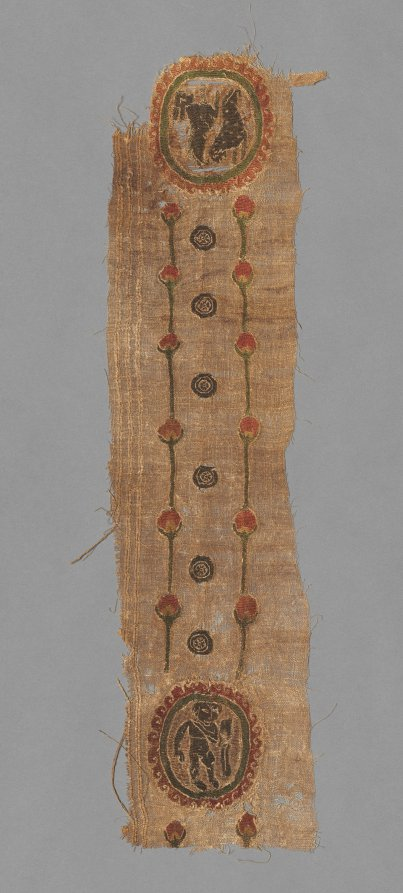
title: Fragment with Two Roundels and a Band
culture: Egypt, Umayyad period (661–750)?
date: 600s - 700s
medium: tabby weave with inwoven tapestry ornament, linen and wool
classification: Textile